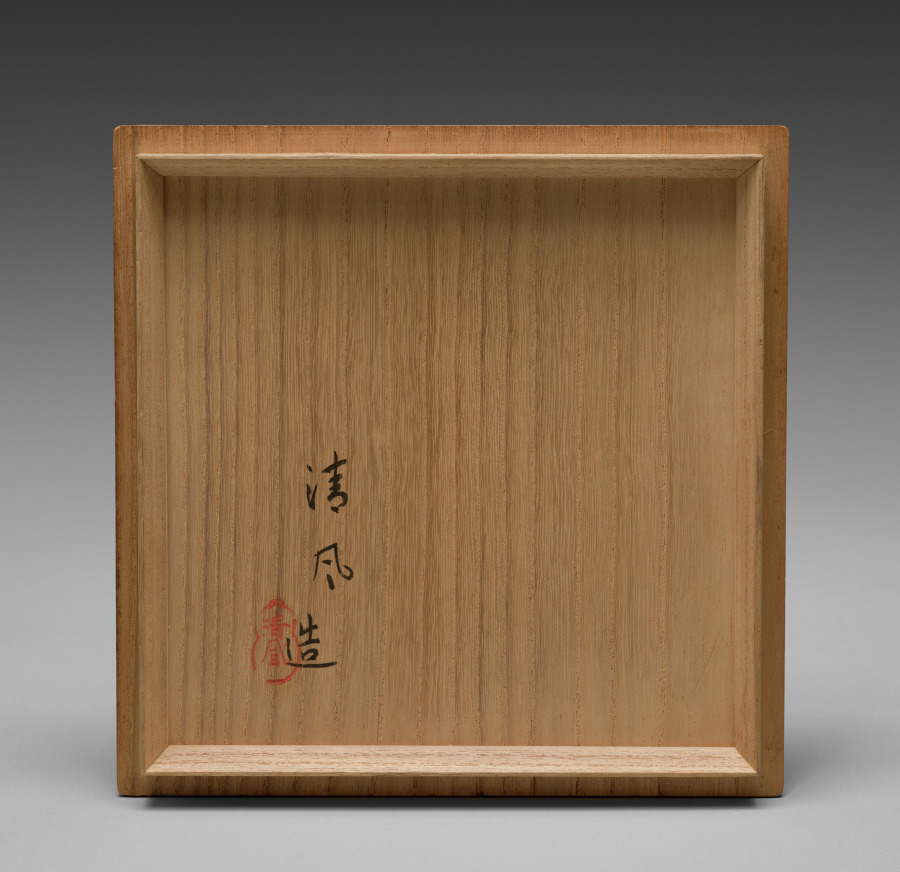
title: Hu-Shaped Vase with Handles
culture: Japan, Taishō period (1912–26) or Shōwa period (1926–89)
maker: Seifū Yohei IV (Japanese, 1872–1951)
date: 1914–46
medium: Porcelain with molded and carved design and green glaze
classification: Ceramic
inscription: 清風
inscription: 成山清風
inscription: 清風造【印】清風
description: Many of the vases created by Yohei III and IV were made with reference to and in emulation of Chinese ceramics in both form and glazing. The Seifu studio was inspired by later Chinese copies of two other archaic vessel types, the hu (Japanese ko) and guan (Japanese kan). In simple terms, in their original contexts, the hu and guan were storage jars that also appeared in ritual contexts. This hu-form vase by Yohei IV has a green glaze and handles in the shape of an elephant head. The details of the elephant heads are quite easy to miss, but a close look reveals that each has carved eyes with pupils defined, tiny ears and tusks in very low relief, and a curved trunk with the end curled up. This sort of container is even known as the “elephant ear” type. The only other decorative element on the vase’s pear-shaped body is a raised cordlike band around the shoulders.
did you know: The handles are shaped like elephant heads.